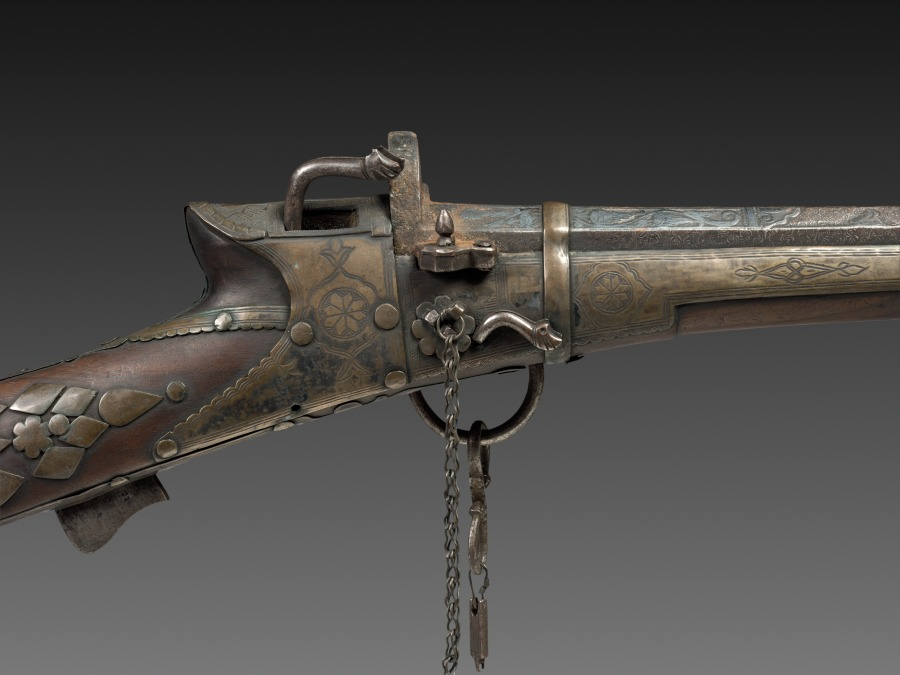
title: Matchlock Musket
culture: Turkey, Ottoman period (1299–1922)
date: c. 1750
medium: Wood, steel, brass, mother-of-pearl inlay, and leather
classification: Arms and Armor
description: Collectively, the Safavid, Mughal, and Ottoman empires are known as the Gunpowder Empires. Particularly from the 1500–1700s, they were among the strongest economic, cultural, and militaristic powers. Each trained and equipped their armies with the latest gunpowder firearms, particularly cannons and muskets. While used in battle, muskets were also used for leisure activities, particularly hunting. The decoration on this musket suggests it was a courtly item, fitted with a leather pad to protect the shooter from the force of the explosion after firing.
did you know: A matchlock musket was loaded from the muzzle end with a scouring stick kept in a sleeve on the underside of the barrel.